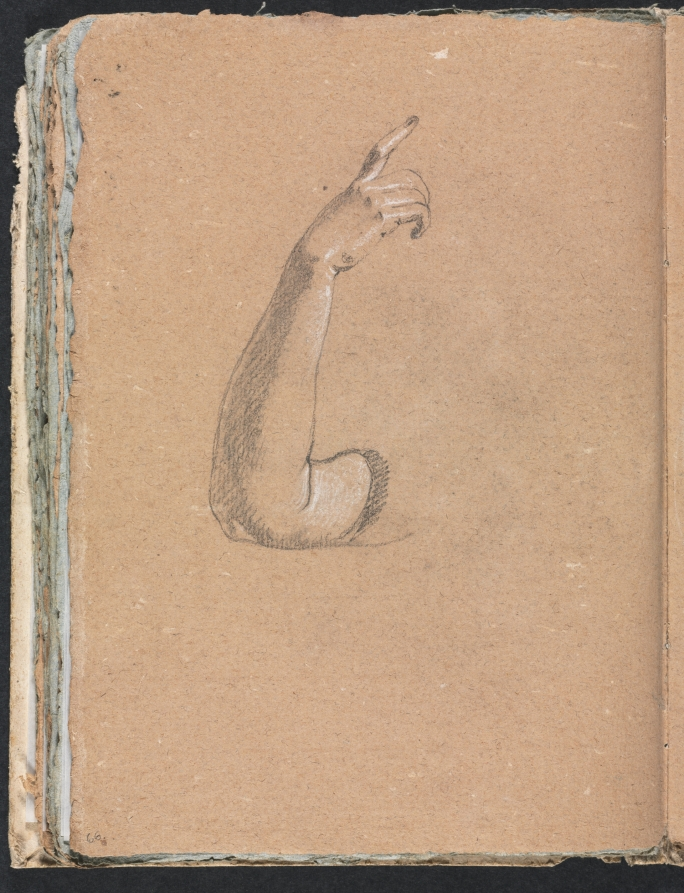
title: Verona Sketchbook: Right arm and hand (page 66)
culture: Italy, 18th century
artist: Francesco Lorenzi (Italian, 1723–1787)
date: 1760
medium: black chalk with white heightening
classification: Bound Volume